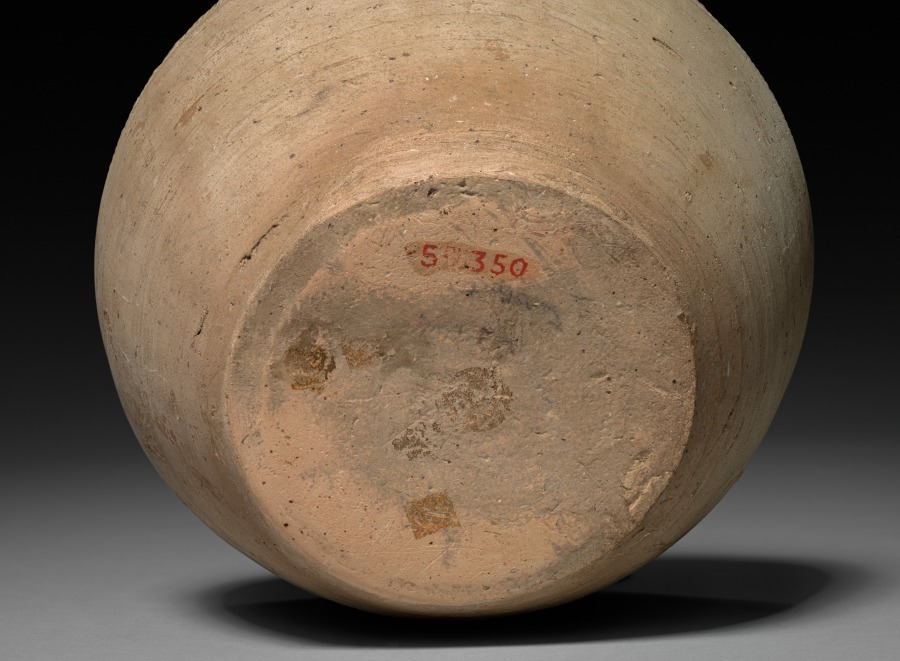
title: Jar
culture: China, Eastern Zhou dynasty (770–256 BCE), Warring States period (475–221 BCE)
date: 481–221 BCE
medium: stoneware with incised and applied decoration under a thin ash glaze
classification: Ceramic